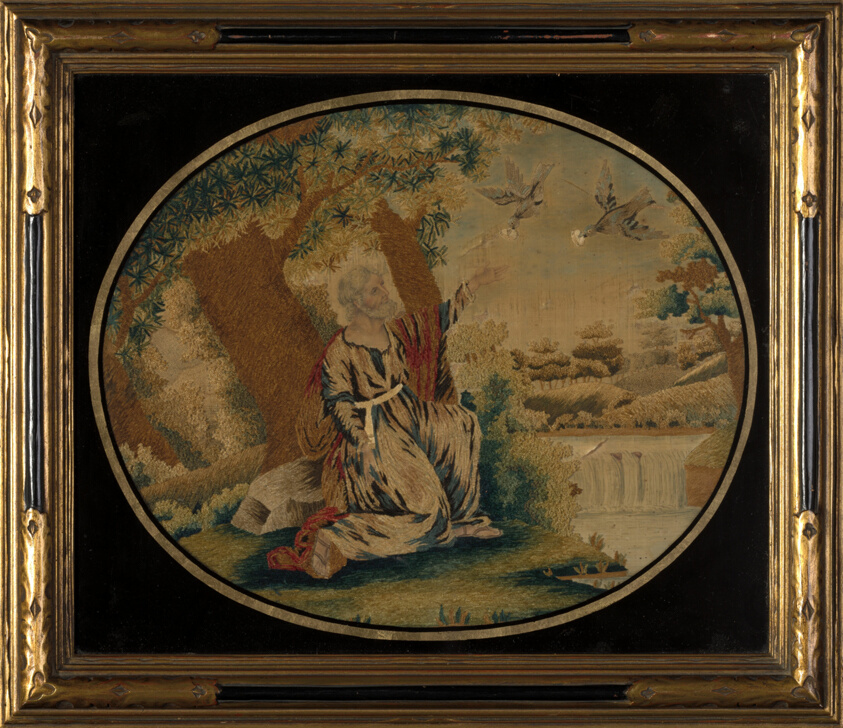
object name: Textile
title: Picture (Depicting St. Francis)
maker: United States, probably Massachusetts or Connecticut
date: 1800/10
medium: Silk, plain weave; underlaid with linen, plain weave; embroidered with silk and silk chenille in back, satin, split and stem stitches; laid work and couching; French knots; painted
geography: United States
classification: textile; needlework (visual works)